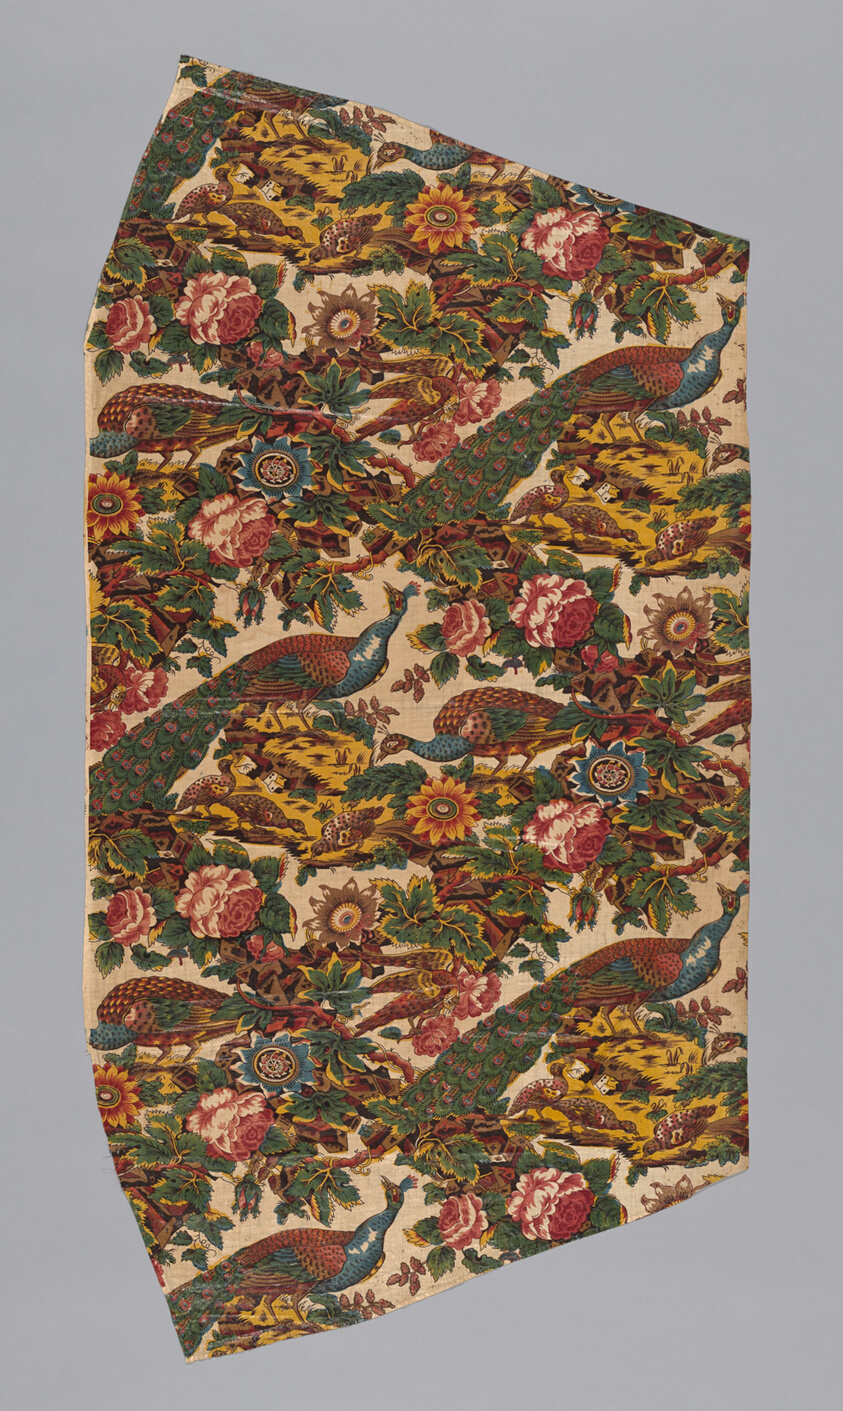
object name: Textile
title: Panel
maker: England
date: 18th century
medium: Cotton, plain weave, block printed; glazed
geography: England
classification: textile; weaving - printed; weaving; printed textile